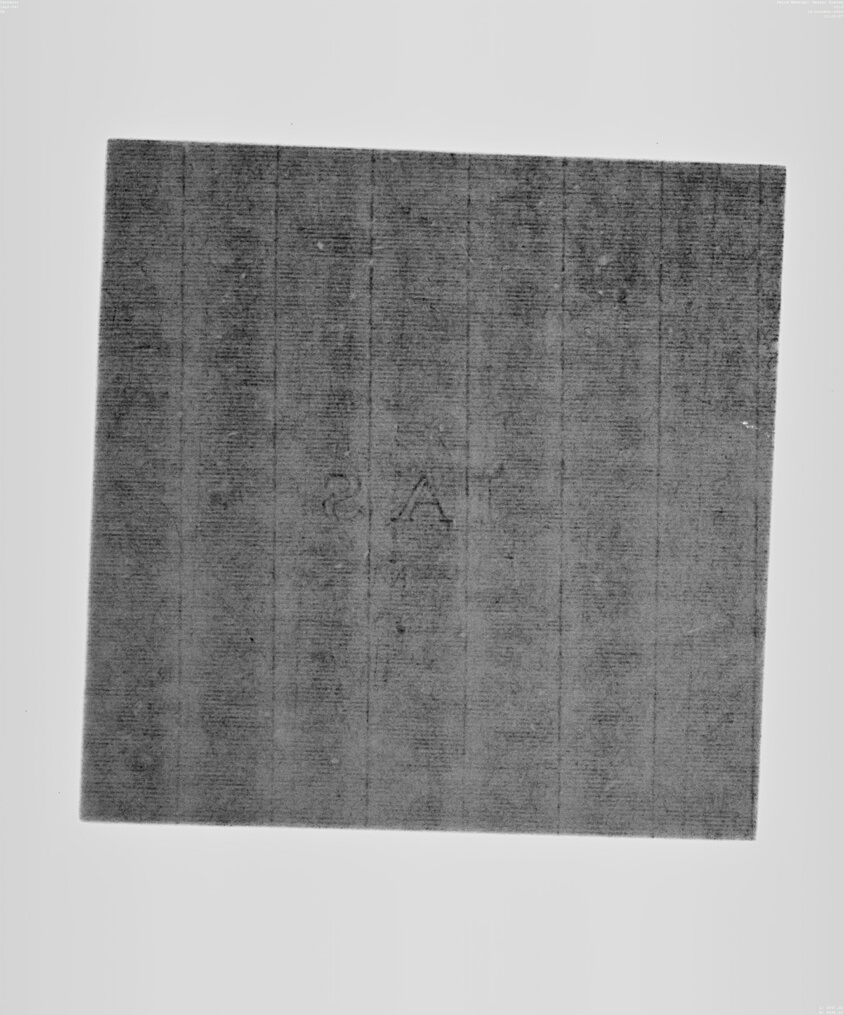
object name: Drawing and Watercolor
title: Adoration of the Shepherds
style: medieval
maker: Attributed to Agostino Carracci; Italian, 1557-1602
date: c. 1580-1600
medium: Pen and brown ink, over black chalk, with incising, on tan laid paper, laid down on ivory laid paper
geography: Italy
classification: pen and ink drawings; manuscript; drawings (visual works); prints and drawing